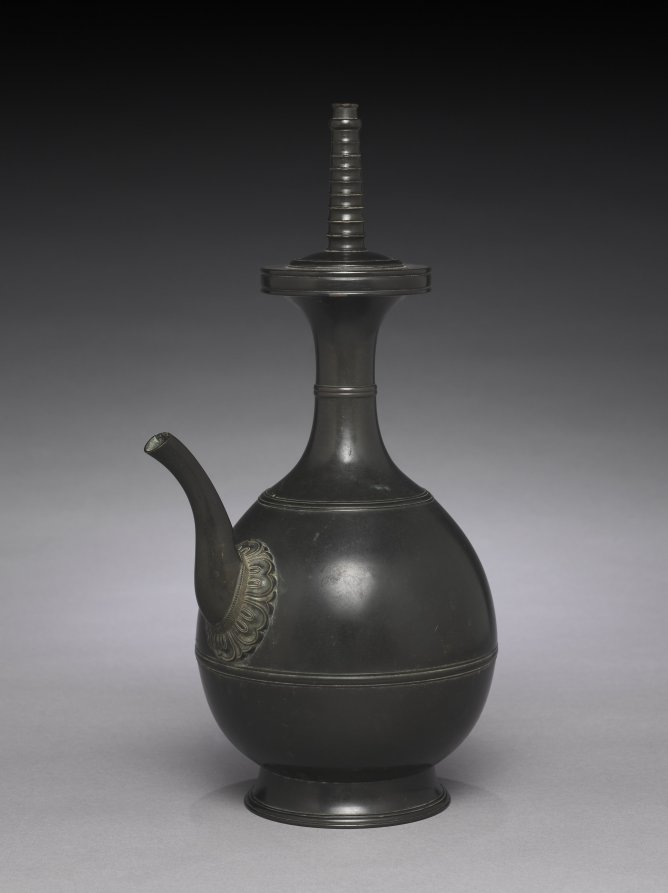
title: Ewer (Fusatsugata Suibyō)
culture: Japan, Kamakura period (1185–1333)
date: 1200s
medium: bronze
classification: Metalwork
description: Ewers of this particular shape developed in Japan for use in Esoteric Buddhist communities, and are called fusatsu-shaped water pitchers. Unlike the ewers commonly used in rituals celebrated before the Buddha, this type is used for the purifying of monks’ hands with water at the start of a Dharma assembly focused on the recitation of the monastic code of conduct, and repentance for transgressions.